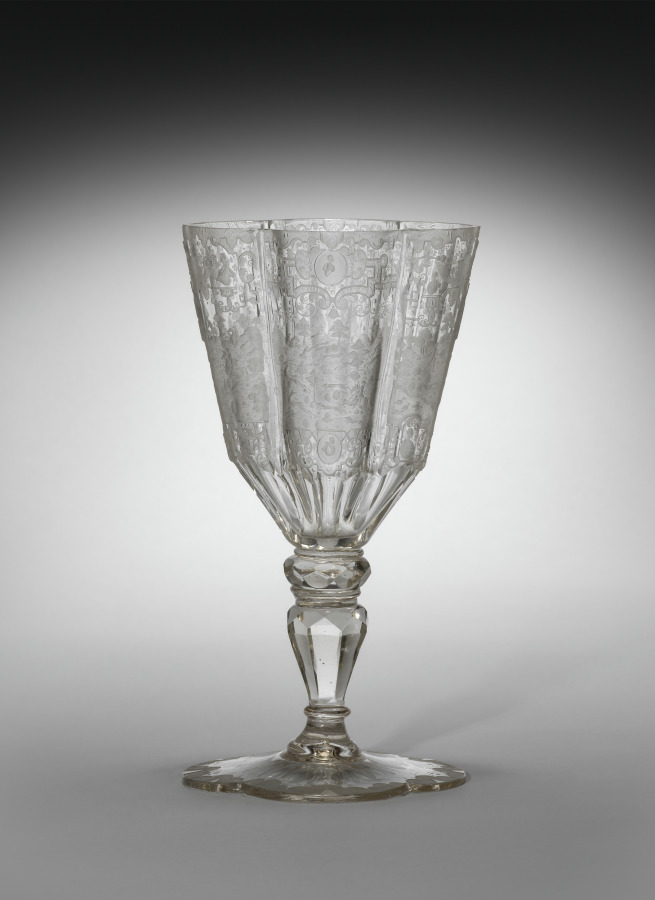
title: Standing Cup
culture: Germany, Silesia, 18th century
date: c. 1725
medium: glass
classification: Glass